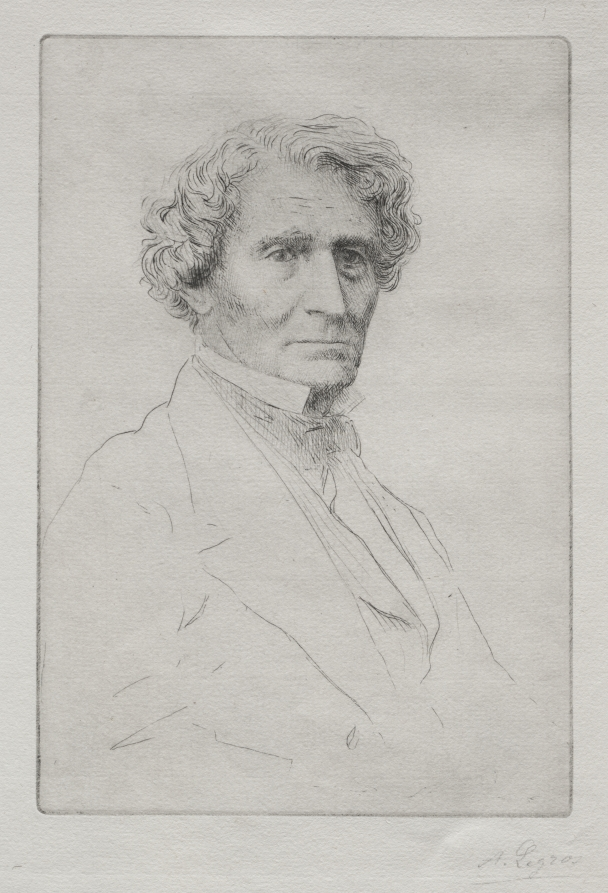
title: Hector Berlioz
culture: France, 19th-20th century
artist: Alphonse Legros (French, 1837–1911)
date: c. 1857–1911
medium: etching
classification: Print